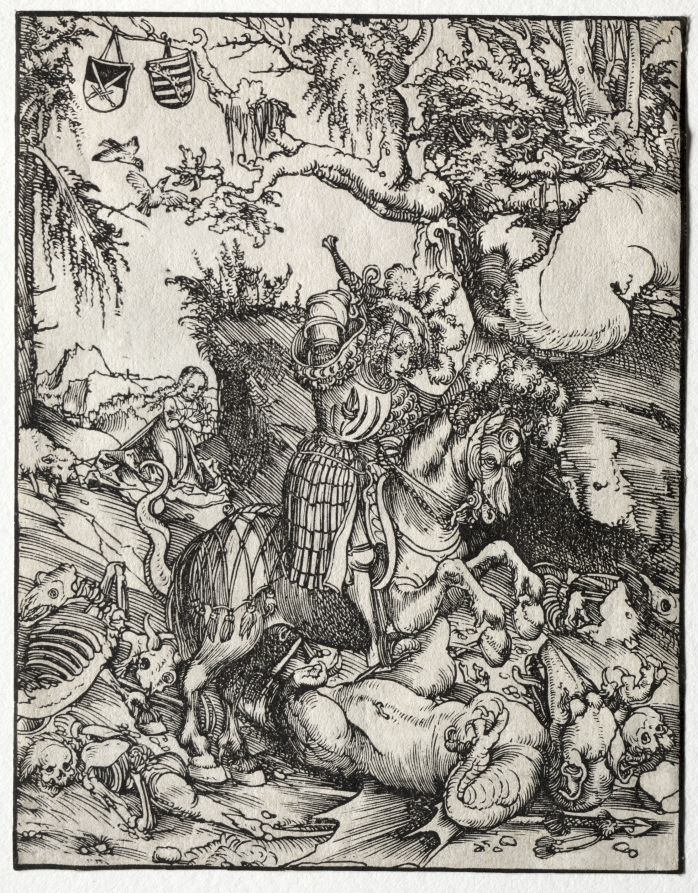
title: St. George Slaying the Dragon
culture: Germany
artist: Lucas Cranach (German, 1472–1553)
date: 1500s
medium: woodcut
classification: Print